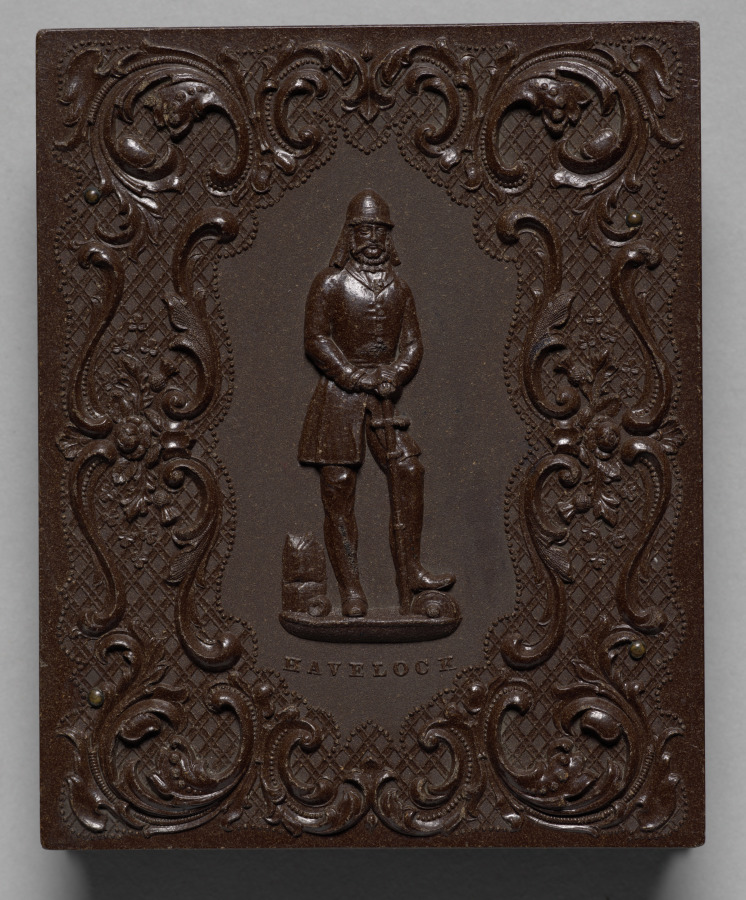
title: Parents of five children doing homework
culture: America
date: c. 1858–60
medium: daguerreotype, quarter plate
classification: Photograph